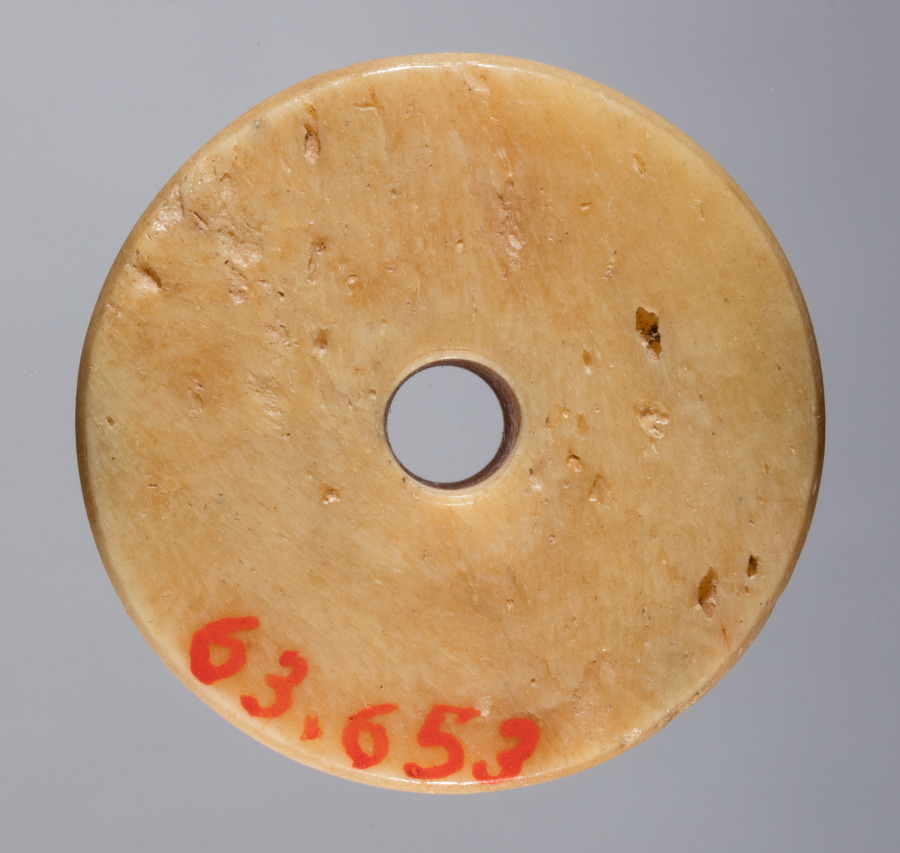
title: Spindle Whorl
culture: Iran, early Islamic period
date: 700s - 900s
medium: bone, incised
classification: Spindle Whorl